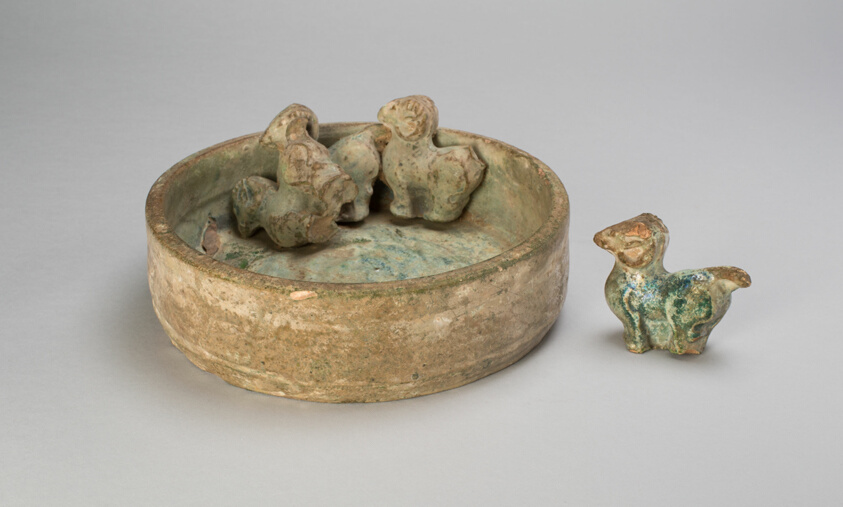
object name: Sculpture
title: Sheep Shed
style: Chinese (culture or style)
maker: China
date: Eastern Han dynasty (A.D. 25–220)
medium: Earthenware with lead green glaze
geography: China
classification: ceramics; asian art; sculpture